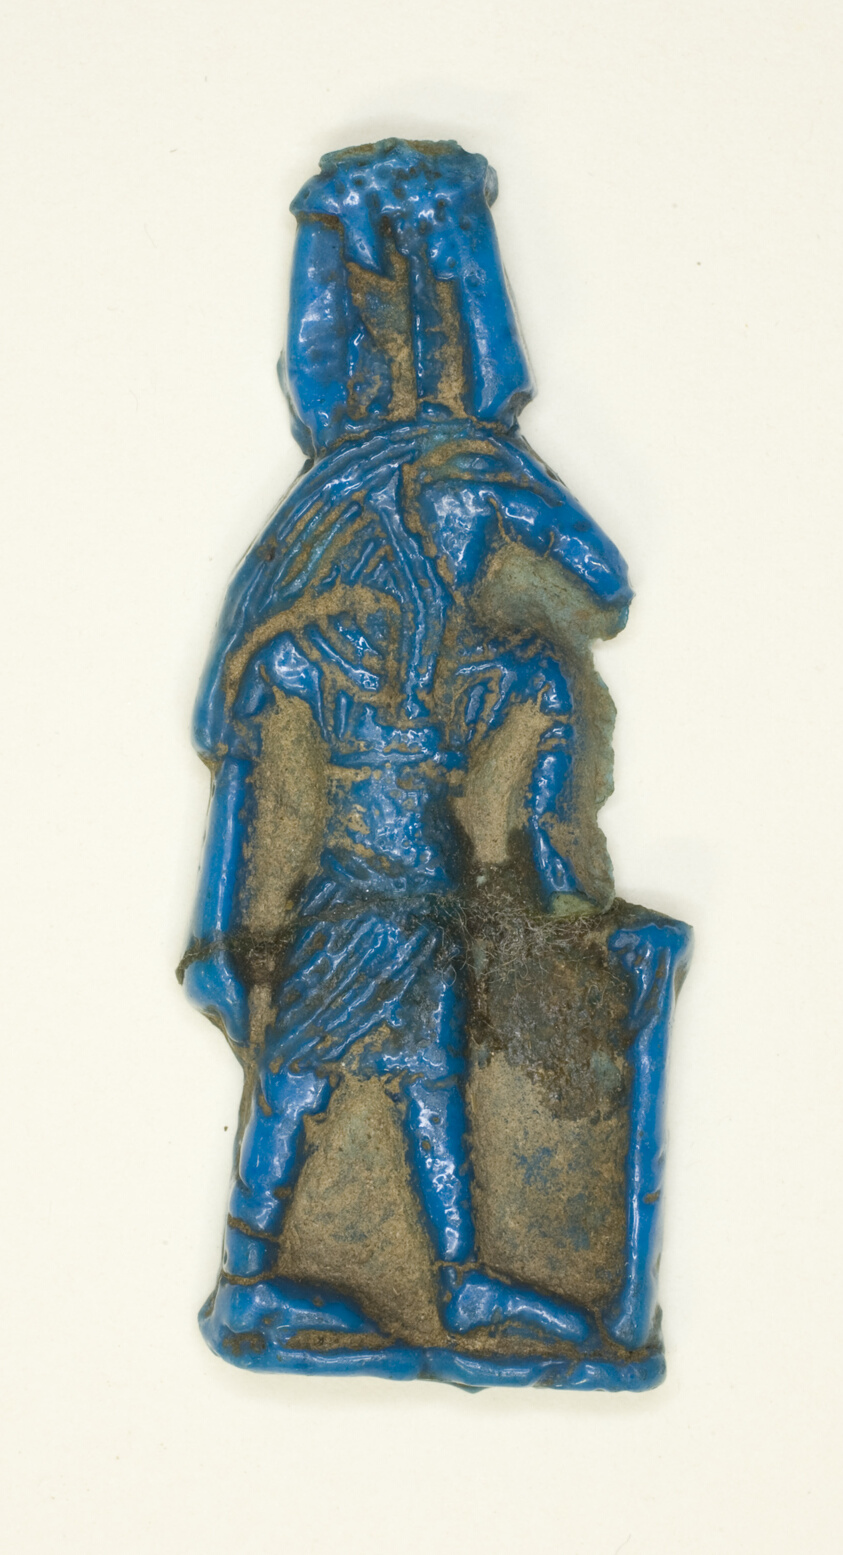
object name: Costume and Accessories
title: Amulet of the God Seth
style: egyptian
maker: Egyptian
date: New Kingdom, Dynasty 19–20 (about 1295–1069 BCE)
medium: Faience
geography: Egypt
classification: amulet; jewelry; ceramics; ancient art; costume; faïence (composite material)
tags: gods (deities)